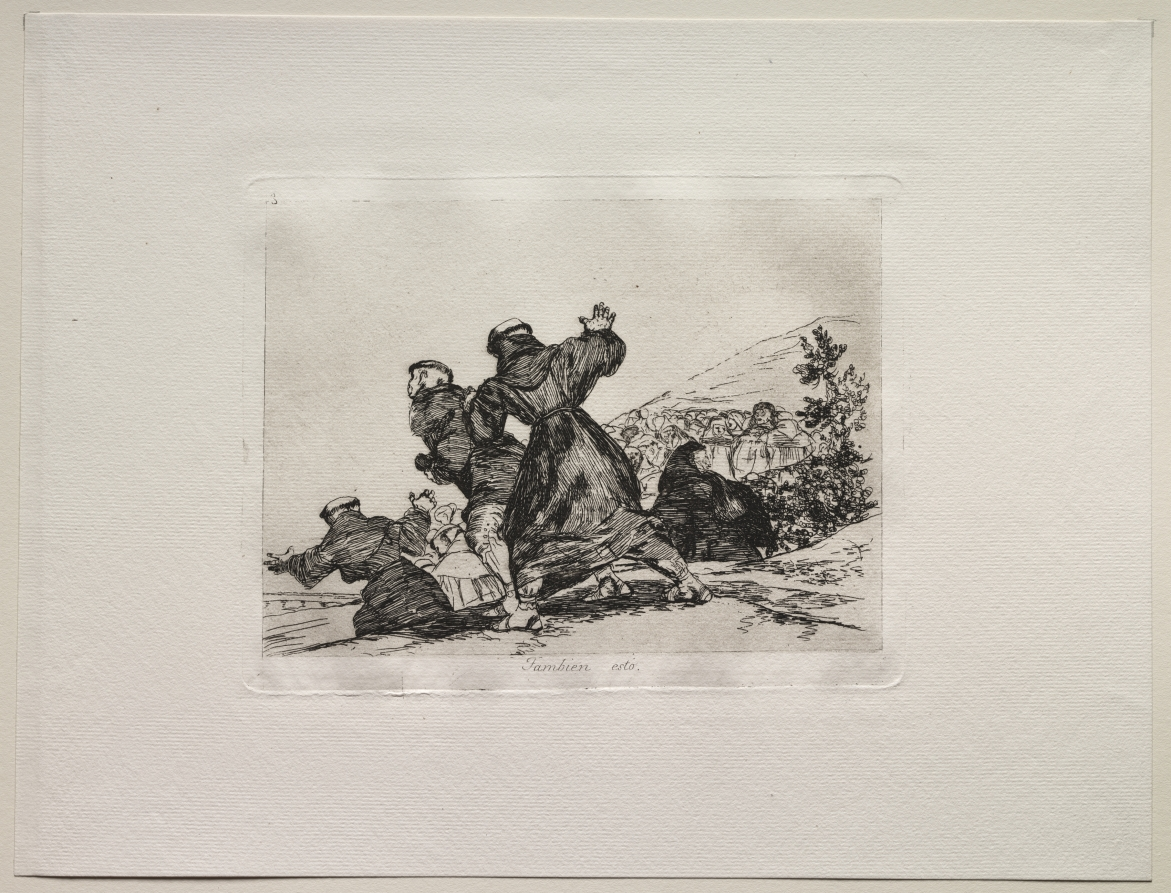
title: The Horrors of War: This Too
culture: Spain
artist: Francisco de Goya (Spanish, 1746–1828)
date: 1810–20, published 1863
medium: etching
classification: Print